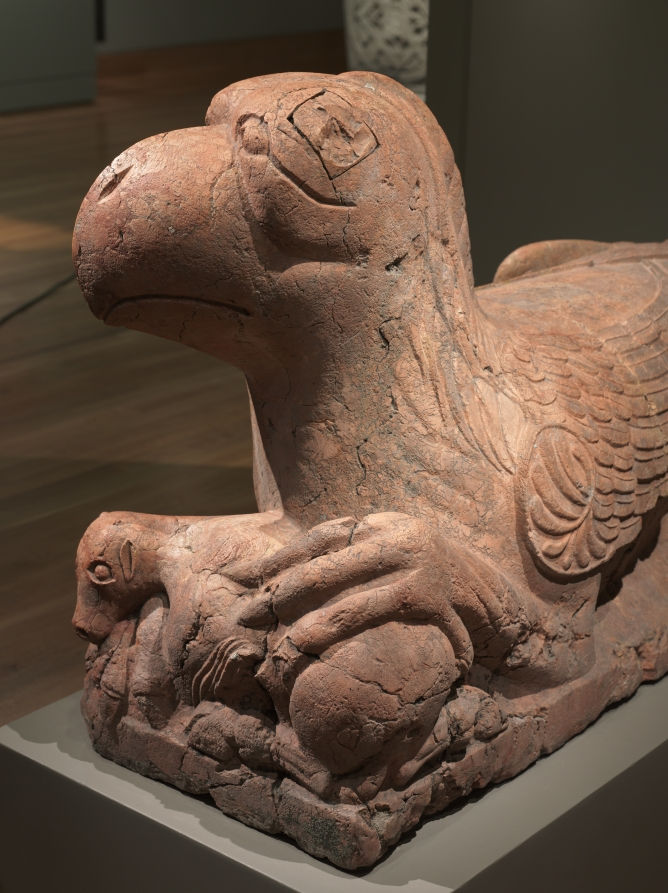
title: Guardian Griffin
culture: Northern Italy, Emilia, 12th century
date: 1150–1175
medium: pink limestone (called "Verona Marble")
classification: Sculpture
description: Griffins are fabled creatures that have the characteristics of an eagle and a lion--combining watchfulness and courage. In Christian art, the dual nature of the griffin was often used to signify that of Christ himself: divine (bird) and human (animal). Griffins were often used as guardian figures in church sculpture and were placed in portals and choir screens. The creatures seen here, with their inward-turning heads, were certainly used for such a purpose. When viewed from the front, one griffin may be seen protecting the figure of a knight between its paws, while the other griffin guards a calf. Their original function was probably to support the columns of a porch in front of a church doorway.